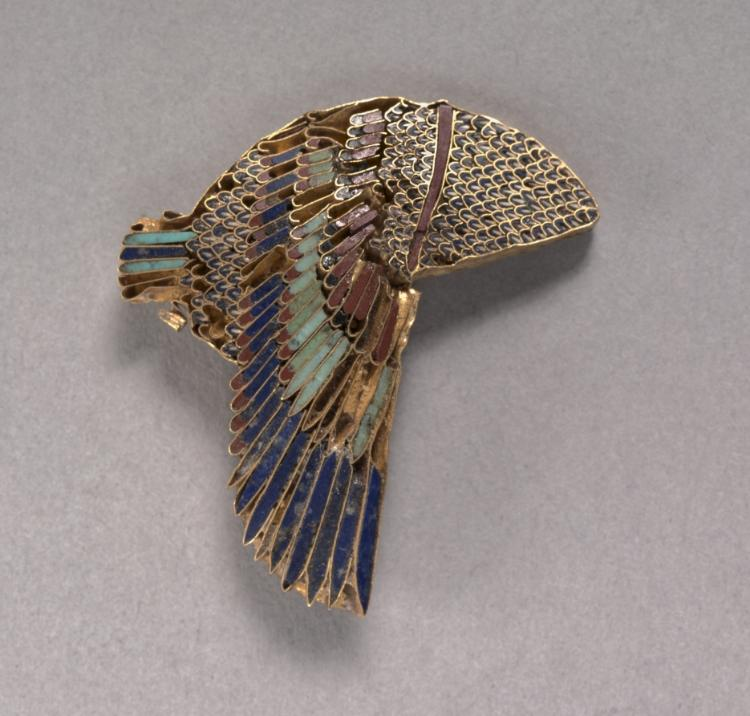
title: Vulture Headdress Inlay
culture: Egypt, Greco-Roman period (332 BCE–395 CE), Ptolemaic dynasty (305–30 BCE)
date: 100–1 BCE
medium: gold and semi-precious stones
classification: Jewelry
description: The vulture headdress was worn by goddesses and queens. This inlay in the form of a vulture headdress has more than 100 stones: lapis lazuli (dark blue), turquoise (light blue), petrified wood (red), and an unidentified white stone painstakingly cut to shape and separated by thin plates of gold. Body, wing, and tail feathers are carefully distinguished in minute detail.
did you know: When creating this headdress, artisans used numerous semiprecious stones with inset partitions to keep them separate. To ensure that the stones would stay in place, a resin-like material was used as an adhesive.